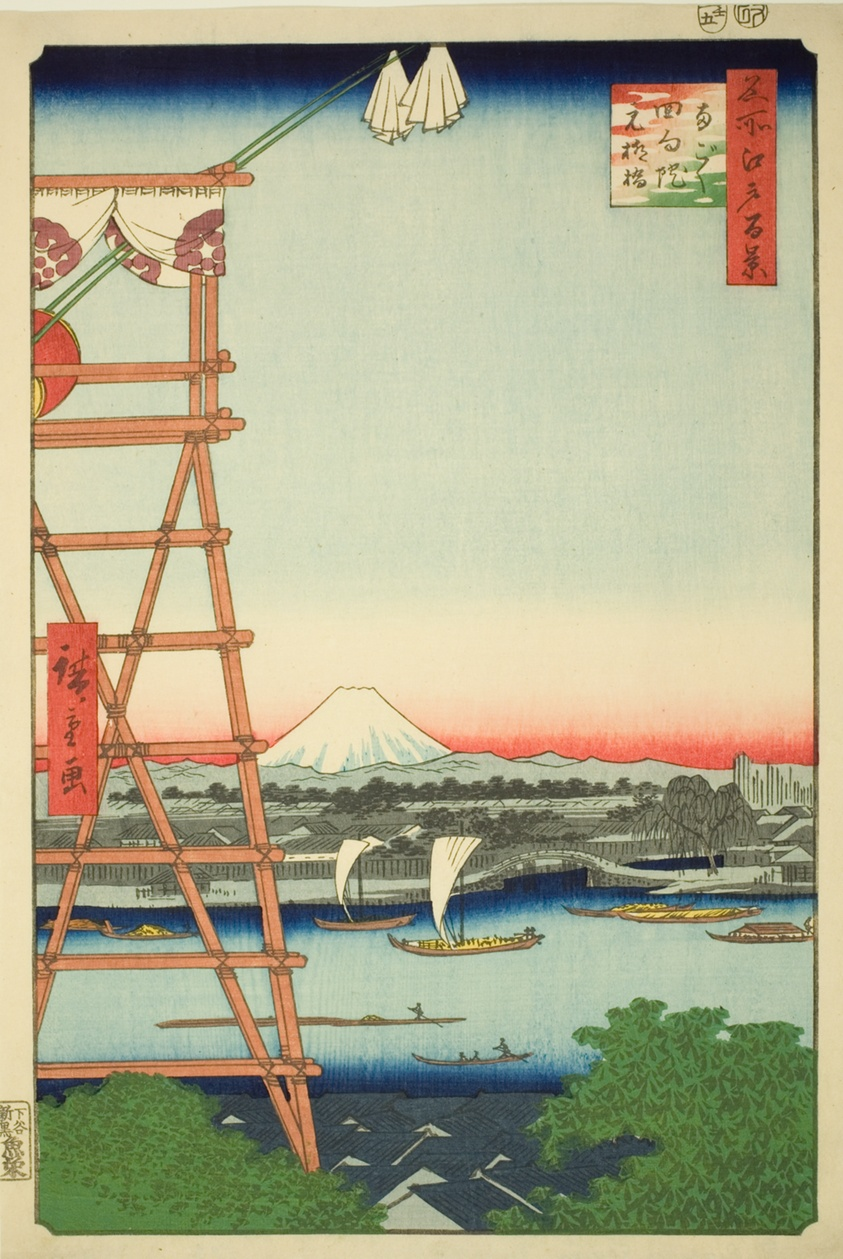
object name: Print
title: Ryogoku Ekoin and Moto-Yanagi Bridge (Ryogoku Ekoin Moto-Yanagibashi), from the series "One Hundred Famous Views of Edo (Meisho Edo hyakkei)"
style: Japanese (culture or style)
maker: Utagawa Hiroshige 歌川 広重; Japanese, 1797-1858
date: 1857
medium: Color woodblock print; oban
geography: Japan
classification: woodblock print; print; asian art